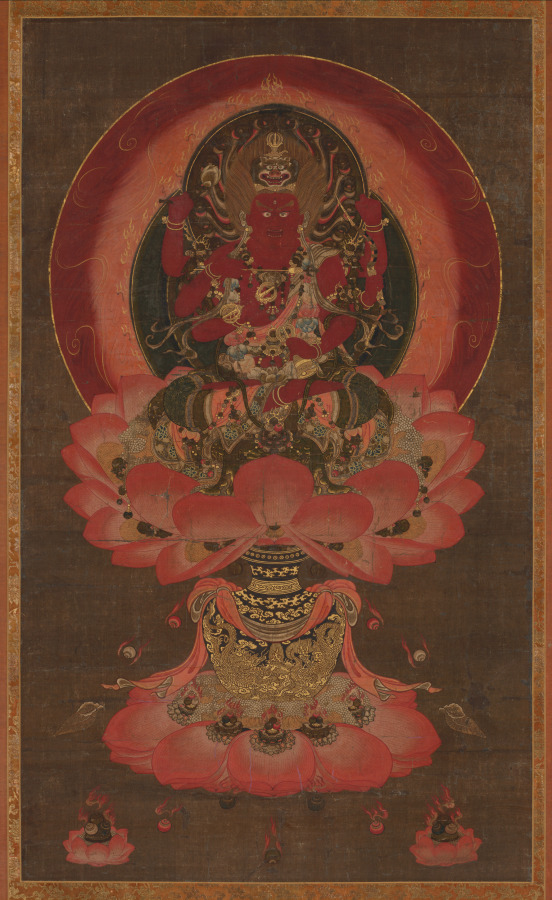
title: Aizen Myōō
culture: Japan, Kamakura period (1185–1333) to Nanbokuchō period (1336–92)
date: 1300s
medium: Hanging scroll; ink, color, and gold on silk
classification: Painting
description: Aizen Myōō is the Wisdom King of Passion. He is one of the Five Great Wisdom Kings who protect the Five Wisdom Buddhas. Each of these Buddhas represents one of the five types of wisdom characterizing a mind purified of disturbing emotions, such as desire, fear, and anger. Aizen’s body is red, and he has six arms. He has a flaming mandorla, or body halo, and sits upon a lotus supported by a vase from which flaming, wish-fulfilling jewels flow freely.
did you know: Desires are mentally deposited into the mouth of Aizen's lion so that they can be consumed.